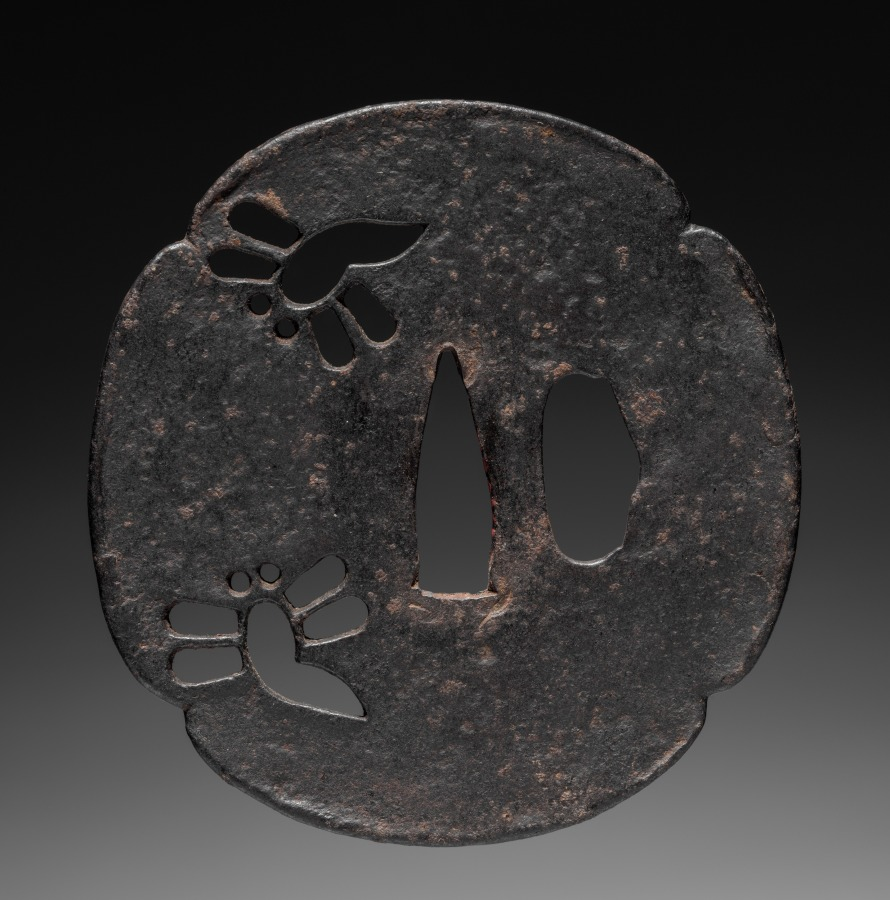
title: Sword Guard (Tsuba) with Dragonflies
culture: Japan, possibly Edo period (1615-1868)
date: c. 1615–1868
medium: iron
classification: Arms and Armor